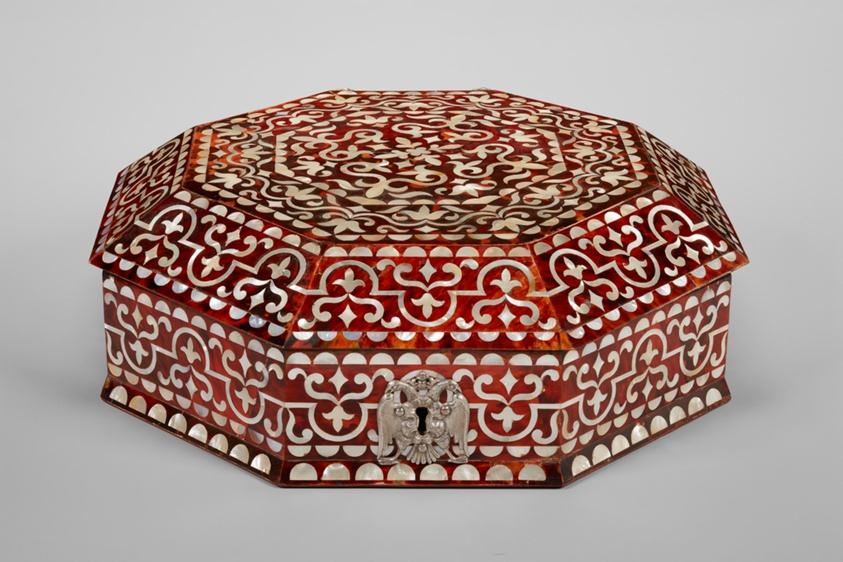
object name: Decorative Arts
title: Coffer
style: 18th Century, Baroque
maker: Peruvian; Probably Lima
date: c. 1750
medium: Wood, tortoiseshell, mother-of-pearl, silver, glass, and paint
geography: Lima department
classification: box; inlay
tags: box, coffer